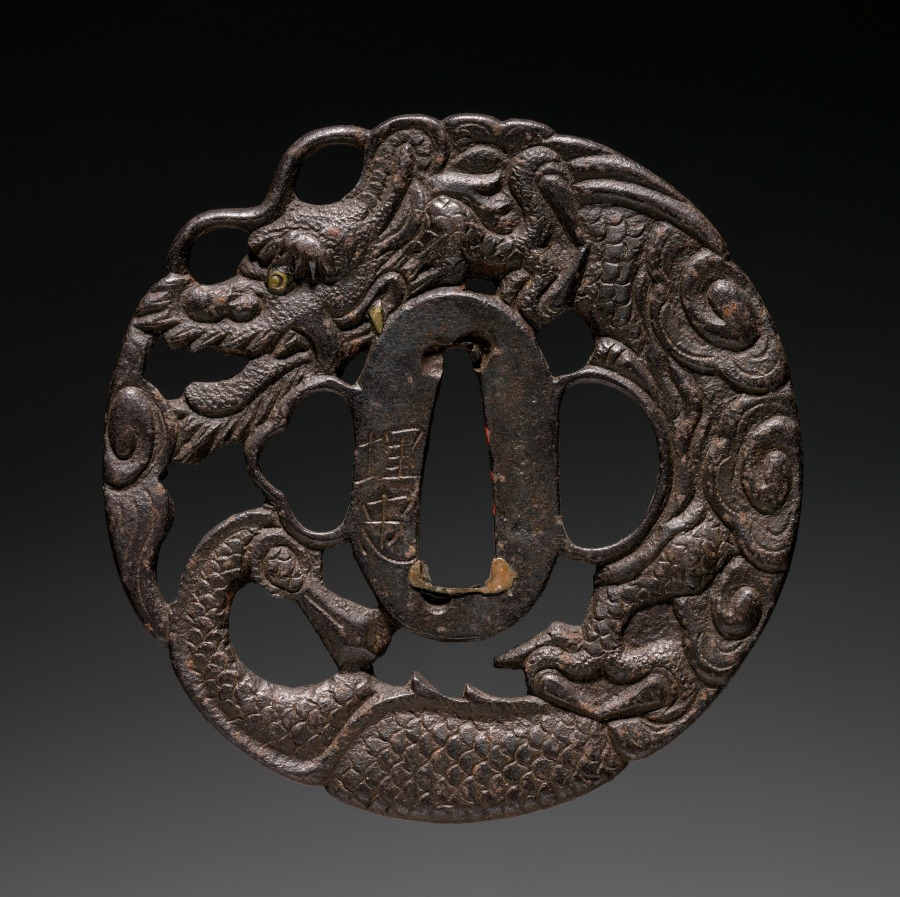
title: Sword Guard (Tsuba) with Dragon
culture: Japan, possibly Edo period (1615-1868)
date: c. 1615–1868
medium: iron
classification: Arms and Armor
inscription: 山城国西陳住埋忠